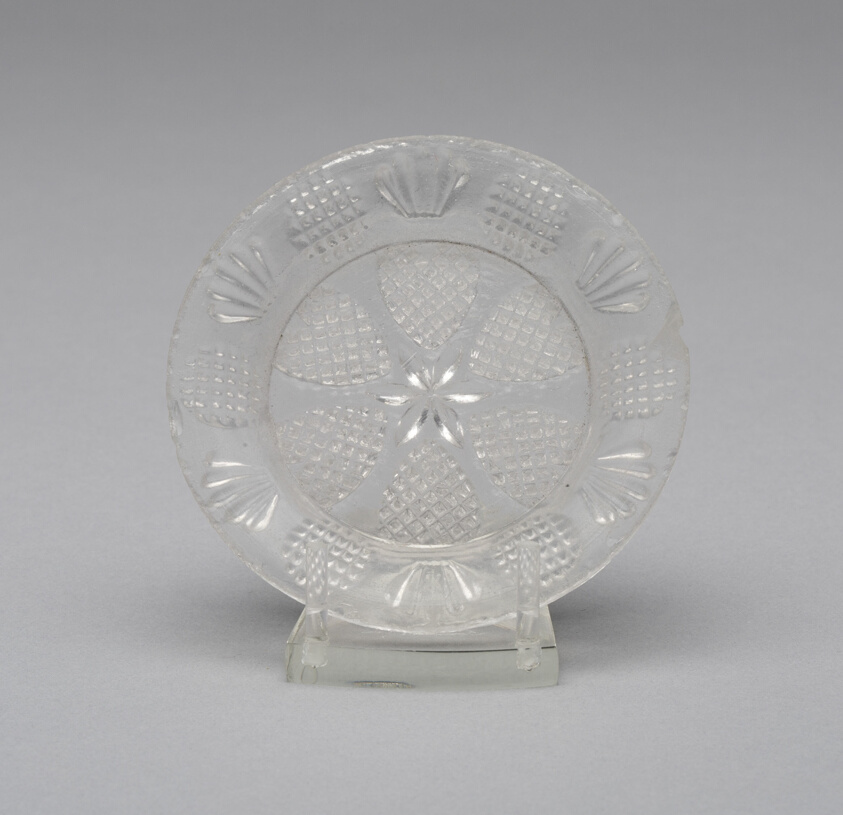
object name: Glass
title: Cup plate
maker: Artist unknown (American, 19th century); Midwest or New England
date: 1830–40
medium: Pressed glass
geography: Midwest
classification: plate (general, dish); glass; american decorative arts; american arts; decorative arts